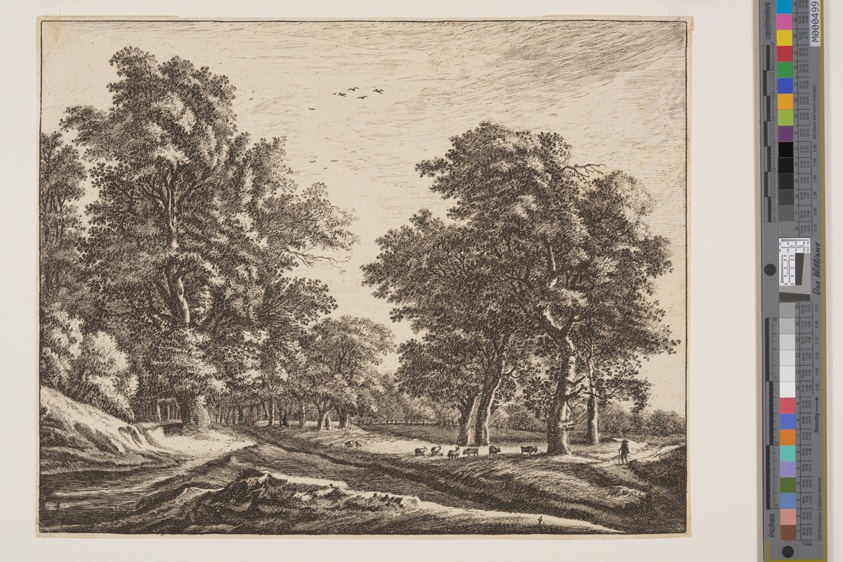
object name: Print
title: No. 4, from Six Views in the Wood of The Hague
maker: Roelant Roghman (Dutch, c. 1627–1692)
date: c. 1640-52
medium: Etching and stipple on ivory laid paper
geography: Netherlands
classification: print; paper; prints and drawing; etching